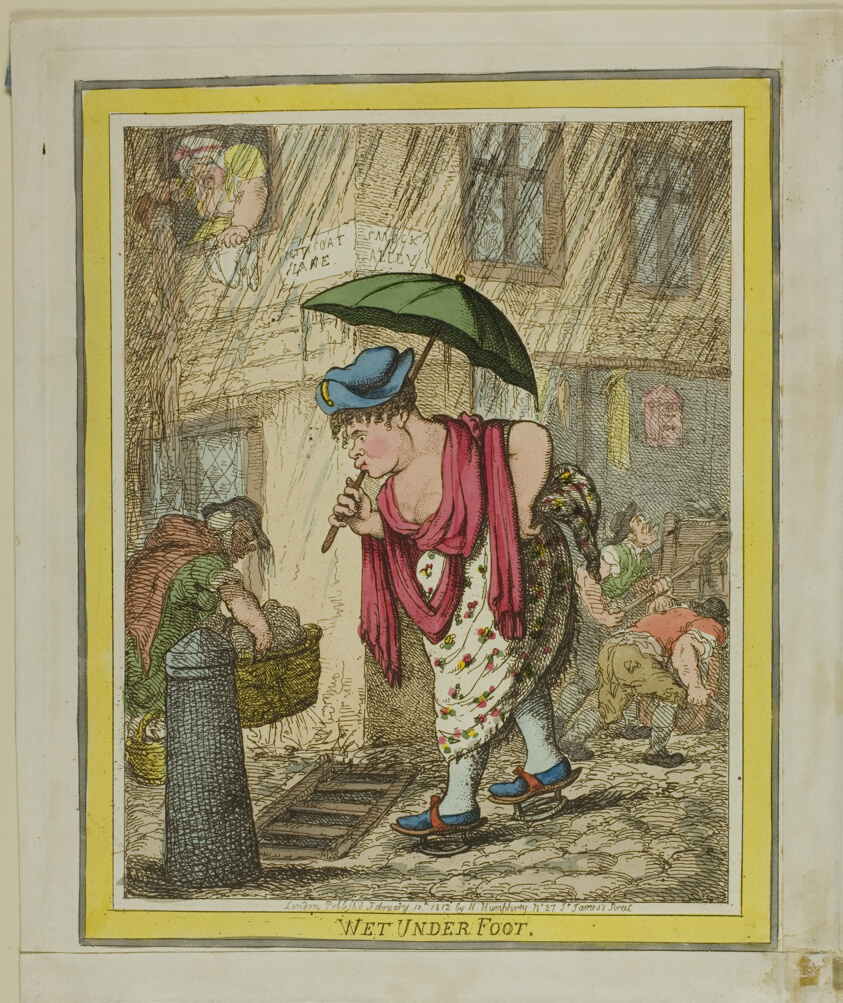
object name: Print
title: Wet Under Foot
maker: Thomas Rowlandson (English, 1756-1827); published by Hannah Humphrey (English, 1745-1818) and Thomas Tegg (English, 1776-1845)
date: published February 10, 1812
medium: Hand-colored etching on ivory wove paper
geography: England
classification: etching; print; prints and drawing